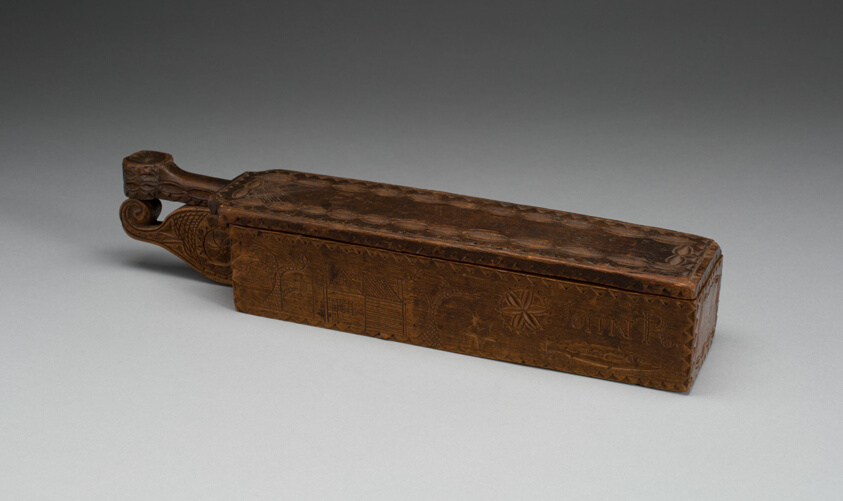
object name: Decorative Arts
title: Box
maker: Artist unknown (American, 18th–19th century)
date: 1790–1860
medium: Maple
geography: United States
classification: box; wood; american decorative arts; american arts; decorative arts